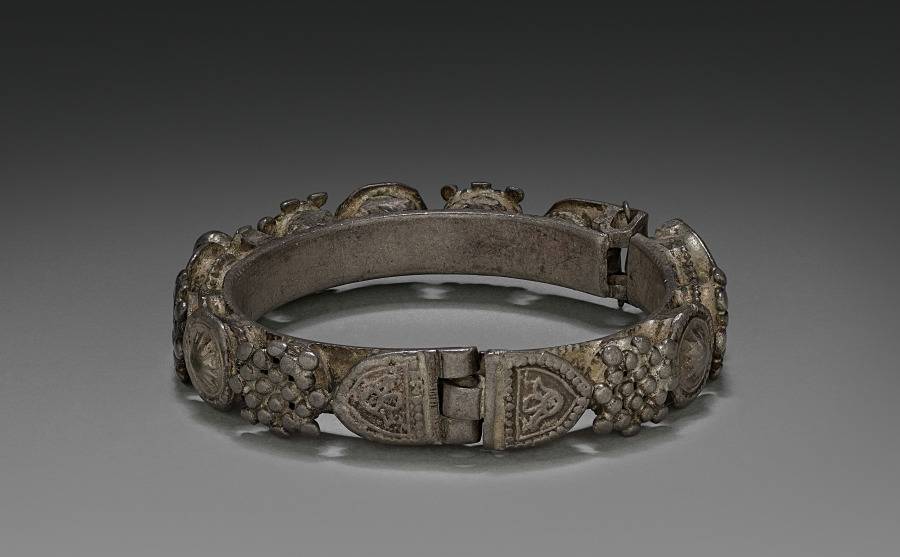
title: Bracelet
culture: India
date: 1800s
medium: silver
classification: Jewelry